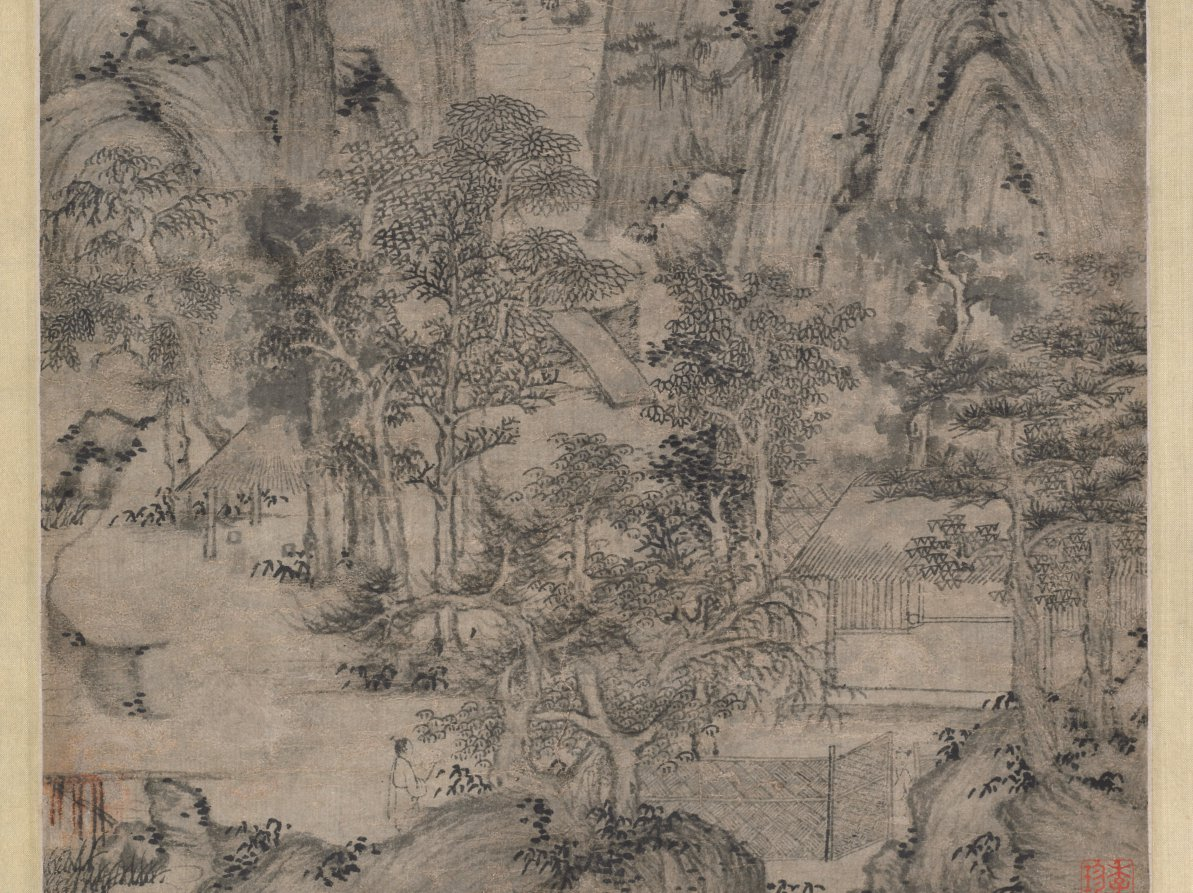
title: Streams and Mountains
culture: China, Yuan dynasty (1271-1368)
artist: Xu Ben (Chinese, 1335–1380)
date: 1372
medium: hanging scroll, ink on paper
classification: Painting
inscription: 綠樹黃鸝處處山， 偶從谿上看雲還。/ 人生未許全無事， 纔得登臨便是閑。 壬子七月十日徐賁為吉夫先生畫 並詩共上 [印] 幼文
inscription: Label on mounting probably by Liang Qingbiao 梁清標 (1620–1691).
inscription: 4 additional inscriptions and 9 additional seals: 1 poem of Xie Hui 謝徽 (c. 2nd half 14th c.); 1 poem and 1 seal of Gao Qi 高啟 (1336–1374); 1 poem and 1 seal of Lu Zhen 盧貞 (c. late 14th c.); 1 poem of Huang Zai 黃載; 3 seals of Liang Qingbiao 梁清標 (1620–1691); 1 seal of Wang Jiqian [C. C. Wang] 王季遷 (1907–2003); 3 seals unidentified.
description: Like many literati of the late Yuan and early Ming dynasties, Xu Ben was entangled with the perils of dynastic change as well as the ups and downs of his official career. It was mainly through the art of painting and poetry, as well as the ideal of reclusion, that he sought feelings of exhilaration and shared them with his friends. Xu created this monumental landscape during one of his periods of reclusion. His innumerable “hemp-fiber” texture strokes create a unifying rhythm among the towering mountains with tightly knit masses of rocks. Nestled among shady trees at the base of the mountain is a rustic retreat, which a scholar approaches on foot to visit with the hermit. Among the five inscriptions at the top of the painting is one by the artist himself. He dedicated the painting to someone named Jifu 吉夫 and recorded a poem in praise of mountains. Green trees, yellow orioles, everywhere are mountains; Aimlessly I return from the stream, where I watched the clouds. Man's life does not allow unbroken ease, But to be able to be high up in the mountain, this is leisure.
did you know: An attendant opens a reed gate to welcome the scholar with a walking stick approaching the rustic retreat.